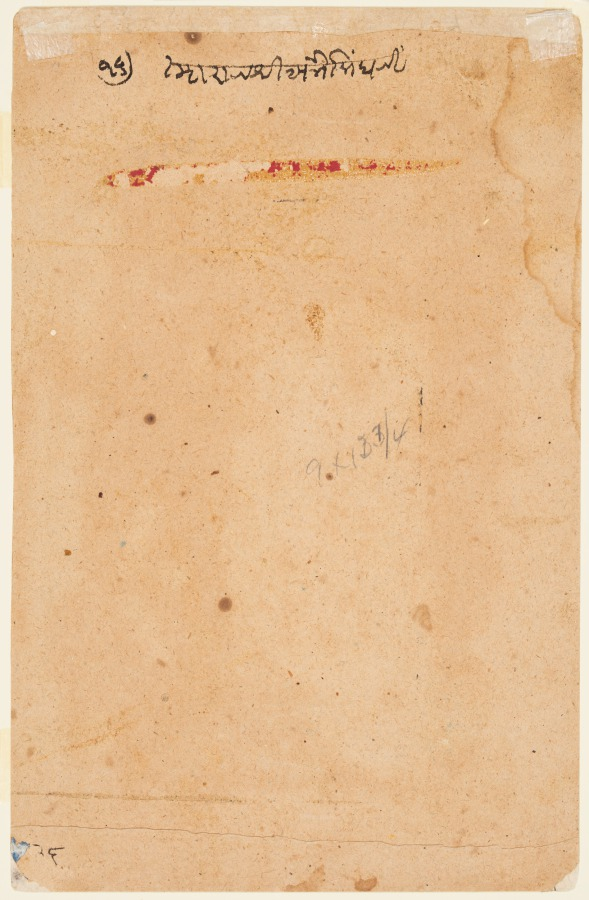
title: Maharaja Abhai Singh of Marwar (reigned 1724–49), Equestrian, Watching Girls Swinging at the Teej Festival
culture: Northwestern India, Rajasthan, Marwar region, Rajput kingdom of Jodhpur, court of Abhai Singh (reigned 1702–49)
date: c. 1740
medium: gum tempera and gold on paper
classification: Painting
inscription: 16. mārāja śrī abhai siṃgha jī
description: The festival of Teej is celebrated primarily by women in northern India and Nepal. The women sing and dance to welcome the monsoon season and observe fasts for the long life of their husbands. In the painting, two women can be seen playfully swinging on a tree branch while a group of women cheer for them.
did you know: A group of horses can be seen bathing in the pond.